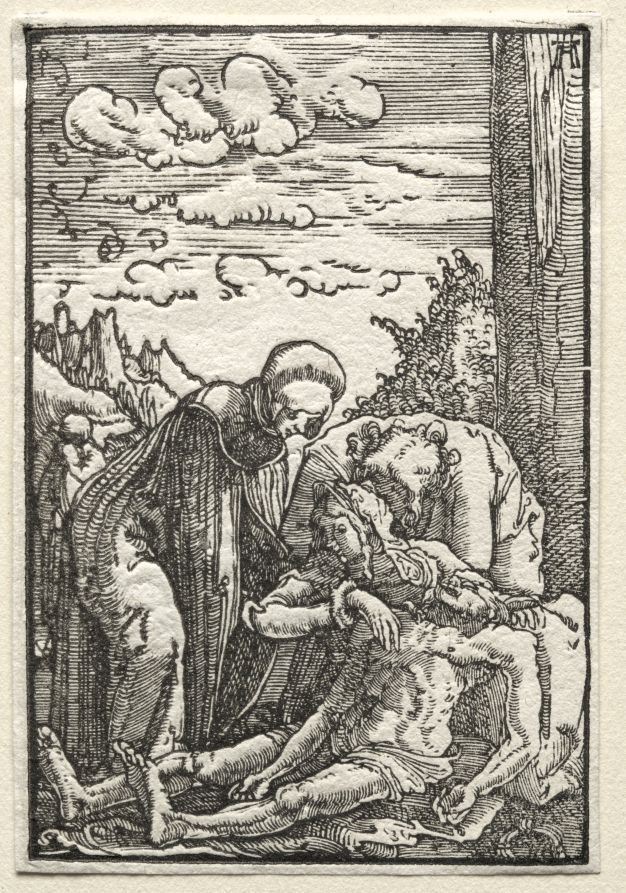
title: The Fall and Redemption of Man: The Lamentation beneath the Cross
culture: Germany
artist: Albrecht Altdorfer (German, c. 1480–1538)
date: c. 1515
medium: woodcut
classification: Print